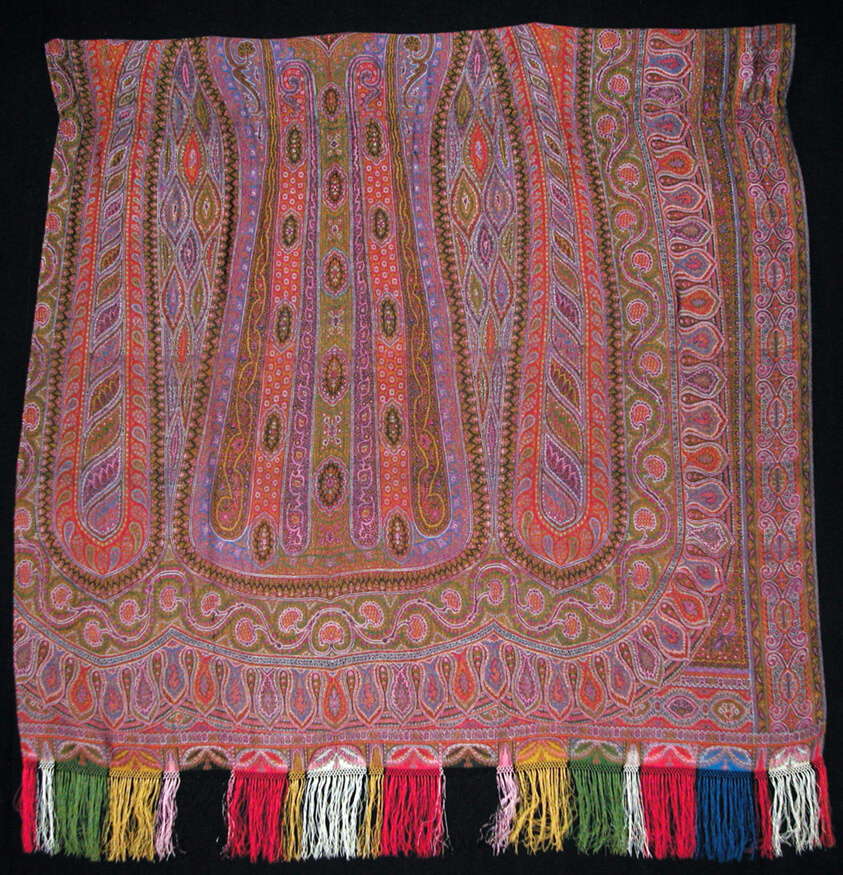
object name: Costume and Accessories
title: Shawl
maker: England, Norwich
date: Late 19th century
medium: Silk, twill weave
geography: England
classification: weaving; costume